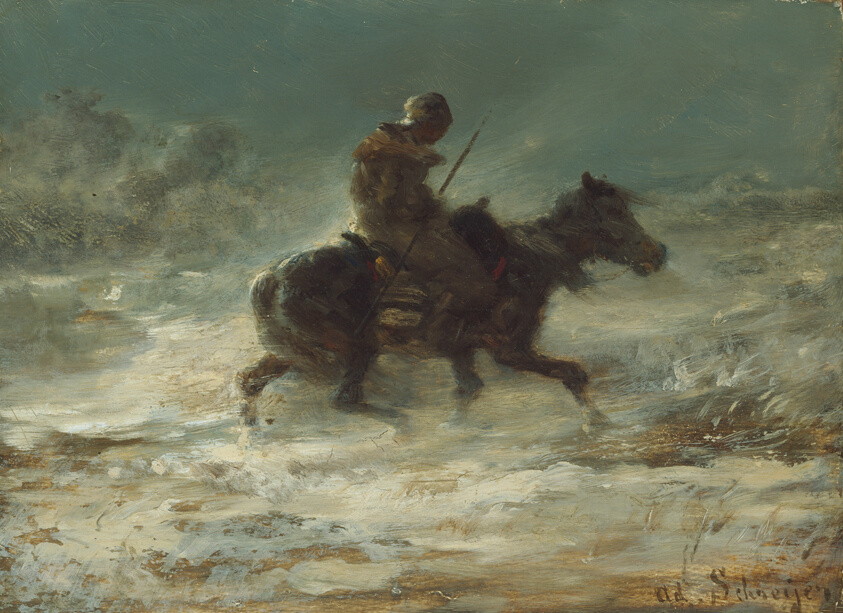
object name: Painting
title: Man with Lance Riding through the Snow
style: nineteenth century, 19th century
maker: Adolphe Schreyer (German, 1828–1899)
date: c. 1880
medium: Oil on canvas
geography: Germany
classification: painting; paint; oil paintings (visual works); oil on canvas; german; european painting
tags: weather/seasons, snow, landscape, winter, man, spears, weapons, horse, horses, animals